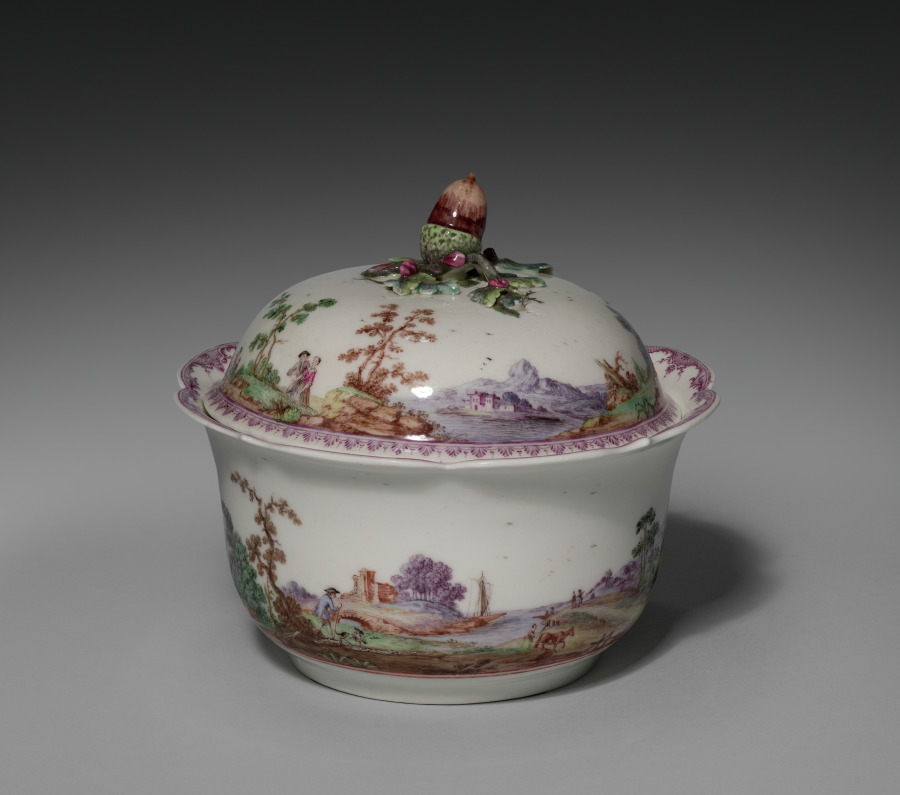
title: Covered Sugar Bowl (Pot à sucre)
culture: France, Vincennes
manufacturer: Vincennes Porcelain Manufactory (French, 1740–1756)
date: 1745–48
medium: soft-paste porcelain with enamel decoration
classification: Ceramic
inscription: In red on bottom of bowl: P.M. In red on interior of lid: P.M. 16 4.8B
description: This covered bowl, likely intended for sugar, is one of the earliest surviving examples of Vincennes porcelain, a reputed French factory moved to Sèvres in 1756. The continuous landscape is painted on this object en pointillé, a method by which a painter forms images with tiny dots. This style may have been influenced by their German competitors at the Meissen Porcelain Factory.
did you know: Three separate shades of purple, one of the most expensive colors to produce on porcelain during this time, are used extensively in this object’s paintings.